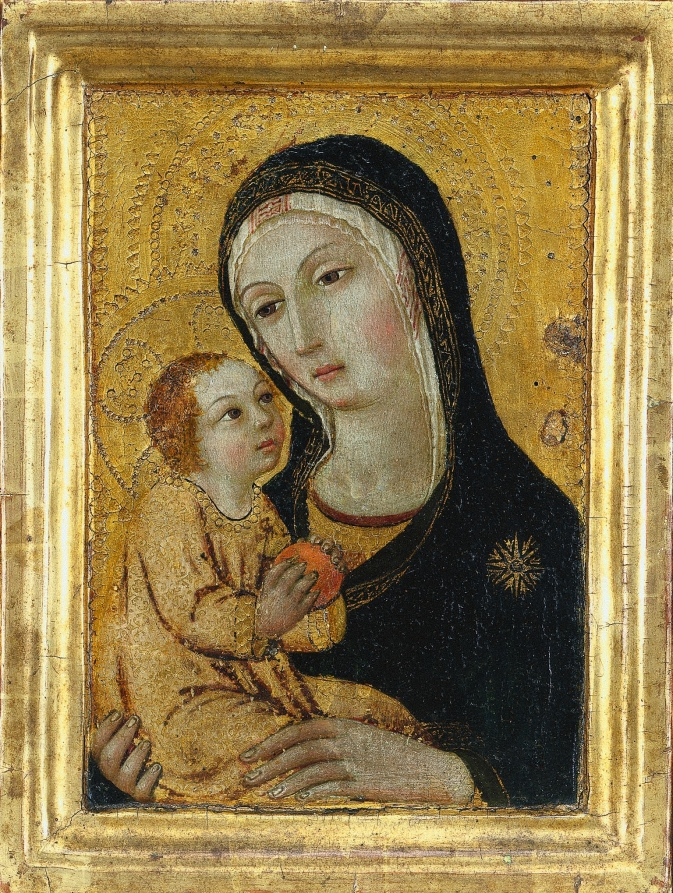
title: Virgin and Child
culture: Italy, 15th century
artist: possibly by Icilio Federico Joni (Italian, 1866–1946)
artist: workshop of Sano di Pietro (Italian, 1406–1481)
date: 1400s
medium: tempera and gold on wood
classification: Painting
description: This picture has at times been seen as a forgery due to its seemingly excellent state of preservation and the simplicity of the composition. It was cleaned, retouched, and re-varnished in the 1960s, giving it an even, shiny surface, hiding to some extent its original appearance. This treatment was probably undertaken to address the losses to the Christ child's hair and the discoloration and abrasion of the Virgin's mantle. Also problematic is the restoration of the frame and sides of the panel, which obscure the age of the work. However, both the panel itself and the pigments employed prove that this is a 15th-century painting—though of lesser quality than the CMA's Virgin and Child Adored by Saints (1924.199). In particular, the Virgin's robe appears to have been painted originally with the pigment azurite, a less costly mineral pigment used as an alternative to ultramarine (made of powdered lapis lazuli). The use of this less expensive material, along with the picture's small size and simple composition, suggest that it was made by a member of Sano's workshop and not Sano himself.